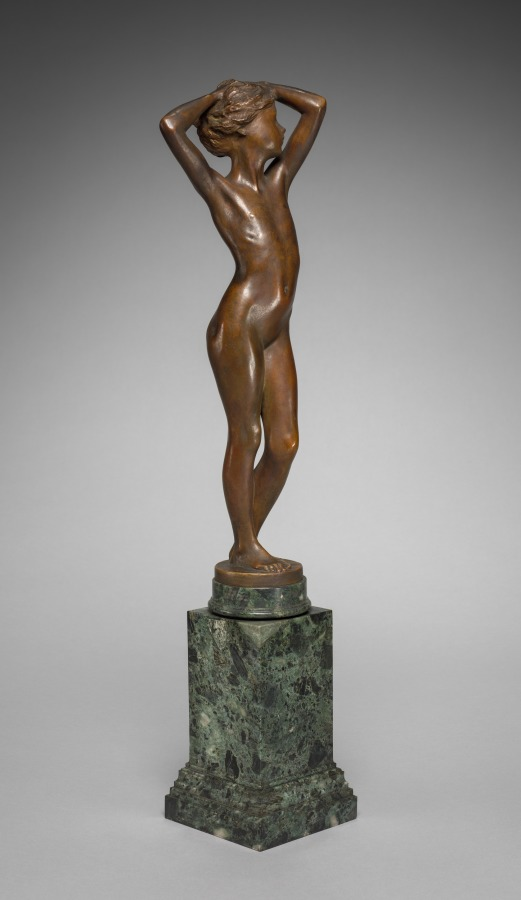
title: Eva, Study of a Nude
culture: America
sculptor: Emil Fuchs (American, born Austria, 1866–1929)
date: 1913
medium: bronze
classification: Sculpture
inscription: Signed on base: EMIL FUCHS 1913